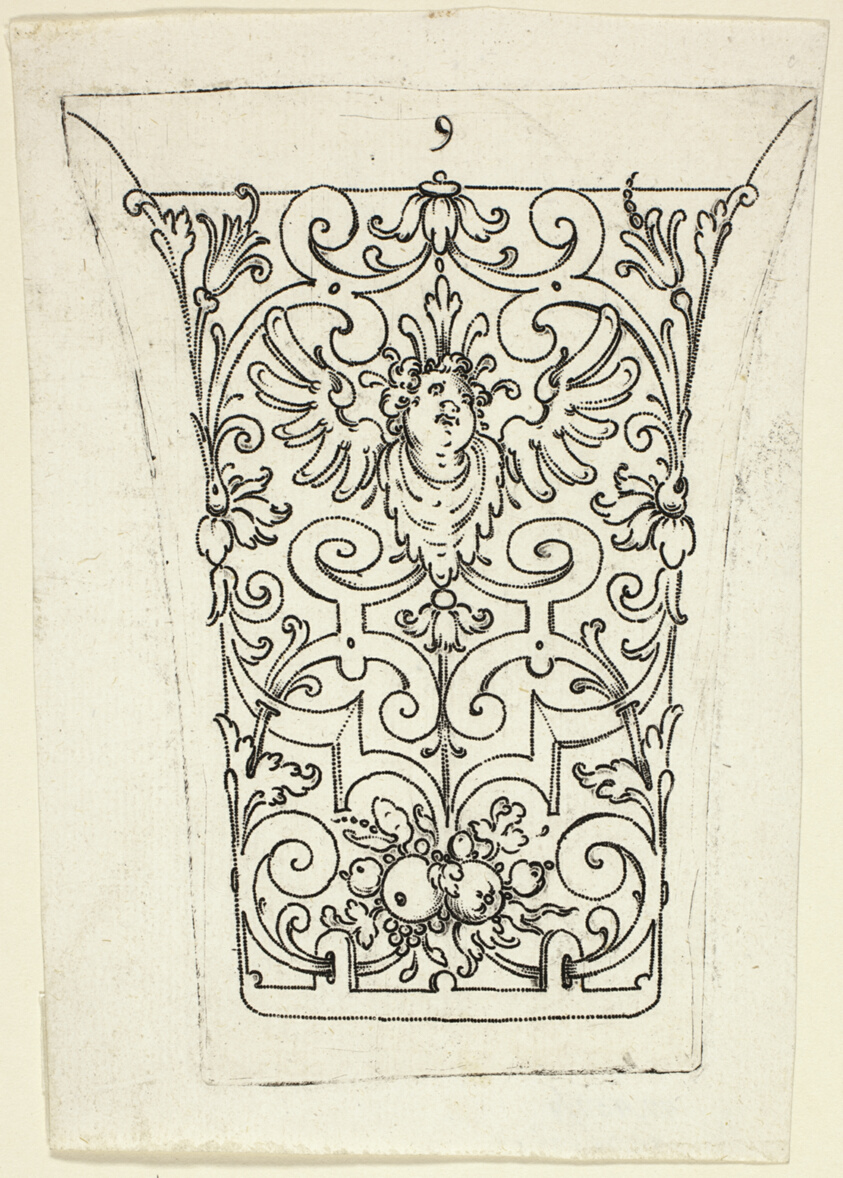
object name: Print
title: Plate 9, from twenty ornamental designs for goblets and beakers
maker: Master A.P. (German, active early 17th century)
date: 1604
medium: Punch engraving in black on ivory laid paper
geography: Germany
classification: engraving; print; prints and drawing